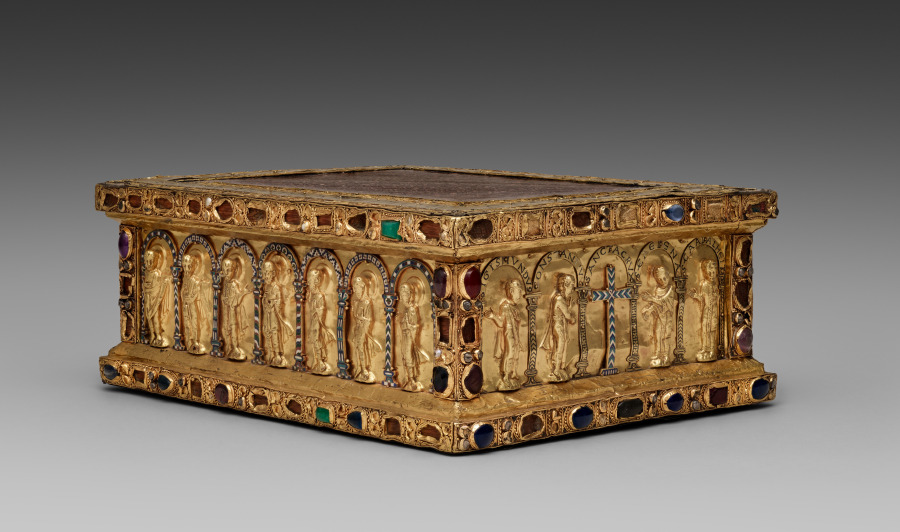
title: Portable Altar of Countess Gertrude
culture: Germany, Lower Saxony?, Romanesque period, 11th century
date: c. 1045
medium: gold, cloisonné enamel, porphyry, gems, pearls, niello, wood core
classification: Metalwork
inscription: GERDRVDIS XPO FELIX VT | VIVAT IN IPSO OBTVLIT HVNC LAPIDEM GEMMIS | AVROQ NITENTEM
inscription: SIGISMVNDVS, CONSTANTIVS, SANCTA CRVX, SCA ELENA, SCA ADALHEIT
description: Commissioned by Countess Gertrude of Brunswick, this portable altar is one of the Guelph Treasure’s earliest and most sumptuous objects. The choice of white-speckled porphyry as the altar stone signals Gertrude’s worldly aspirations; an imperial color since classical antiquity, porphyry was only used by the imperial family. Historical figures of royal and imperial rank are depicted with Christ, the Virgin, apostles, and archangels along the altar’s sides, stressing the countess’s political ambitions and claim of imperial lineage for her own dynasty. The Latin inscription surrounding the altar stone reads, "Gertrude offers to Christ, to live joyfully in him, this stone that glistens with gems and gold."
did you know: On the bottom of this altar is a trap door that opened to reveal small relics of saints wrapped in silk.